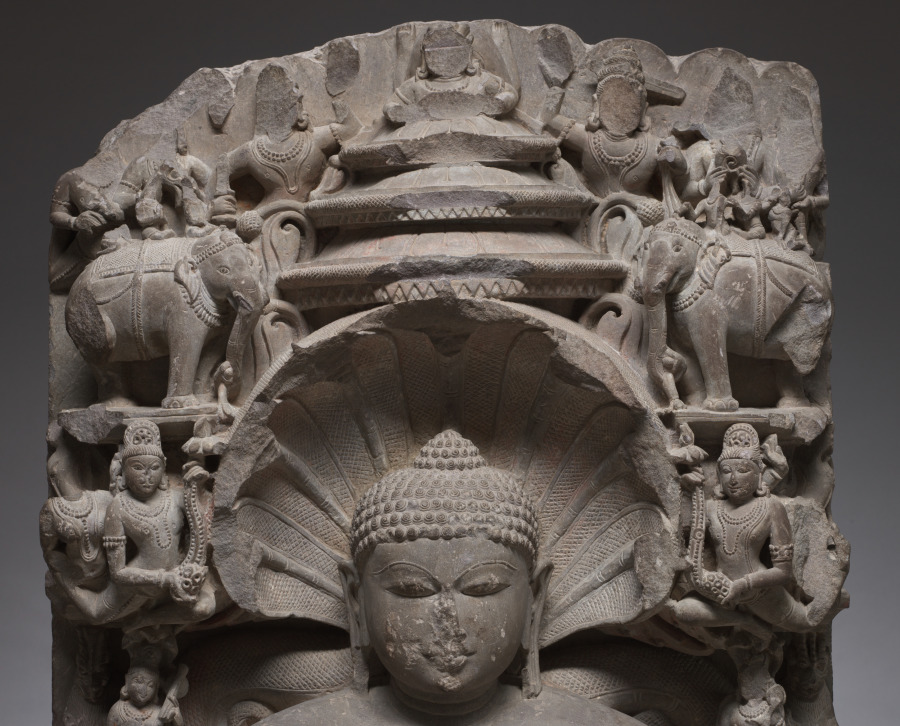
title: Parshva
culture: Central India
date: 800s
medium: sandstone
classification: Sculpture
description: Parshva is the 23rd of the 24 Jinas who achieved liberation. He is the only one who is depicted with a serpent. This sculpture was made for followers of the branch of Jainism called Digambara, who enforce the regulations of total nudity among those actively seeking liberation. The only adornment of his figure is the auspicious symbol on his chest and the wheels of righteousness on his palms. The stark form of thenude body standing in a posture of meditation is masterfully set off from the array of gods and serpent divinities who venerate him. He stands with his feet on a lotus pedestal, but his hierarchically tall form reaches to the heavens, where gods fly to honor him with flower garlands. Three umbrellas over his head indicate his status as a liberated being worthy of worship.